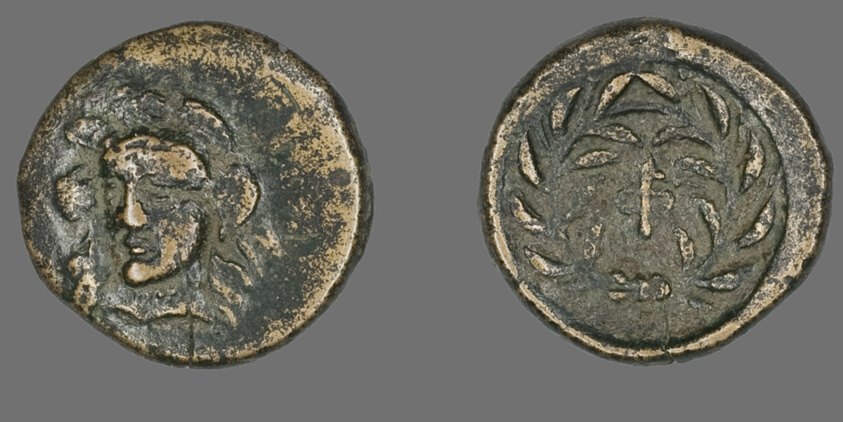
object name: Coin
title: Coin Depicting the Goddess Athena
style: greek, ancient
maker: Greek, minted in Phocis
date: 371-357 BCE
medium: Bronze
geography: Ancient Greece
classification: coin; ancient art